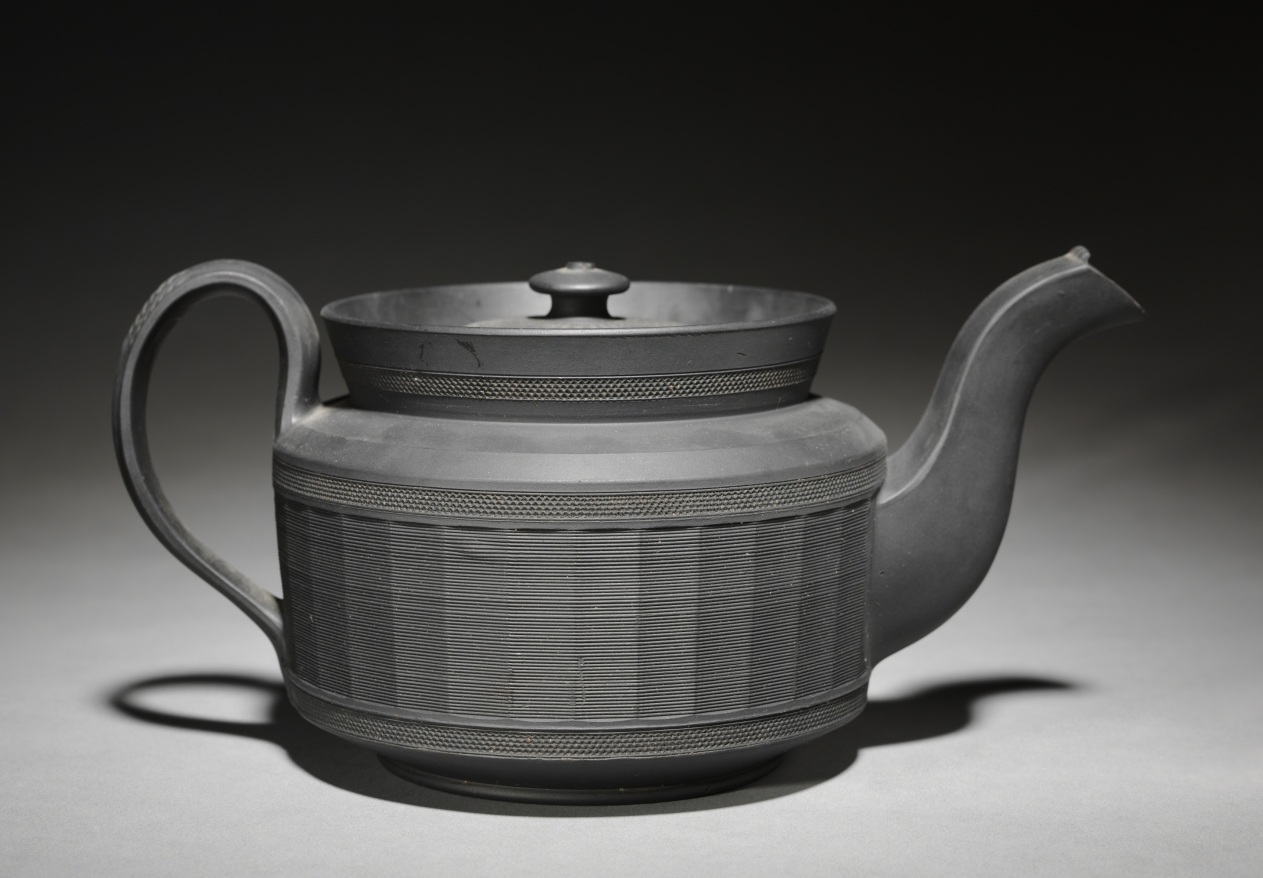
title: Teapot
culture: England, Staffordshire, 19th century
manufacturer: Davenport Pottery and Porcelain Factory (British)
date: 1800s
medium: black basalt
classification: Ceramic